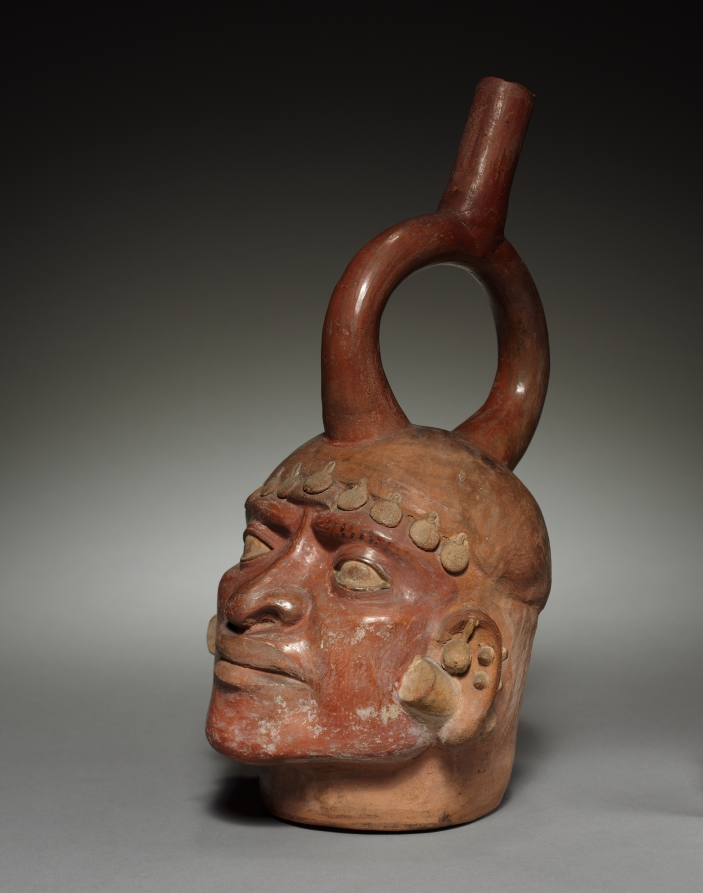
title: Bottle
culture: Peru, Mochica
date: before 1930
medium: pottery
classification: Ceramic